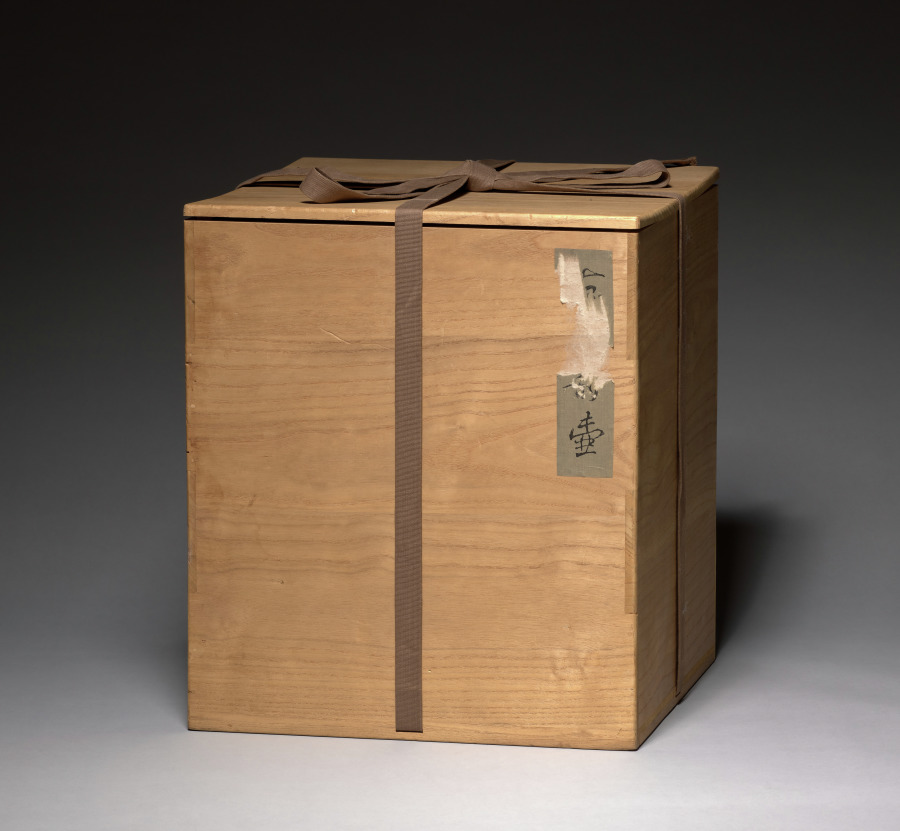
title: Large Jar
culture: Japan, Muromachi period (1392–1573)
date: 1400s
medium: stoneware with natural ash glaze (Shigaraki ware)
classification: Ceramic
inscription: Box inscription (front): 「不明」壺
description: The orange color of this jar comes from iron in the clay. Natural ash glaze settled on the vessel during firing. Originally intended for grain storage, rustic containers like this one were also prized by tea enthusiasts, who appreciated the uncalculated beauty of the glaze and the asymmetry of these humble objects. They used them to store tea leaves.